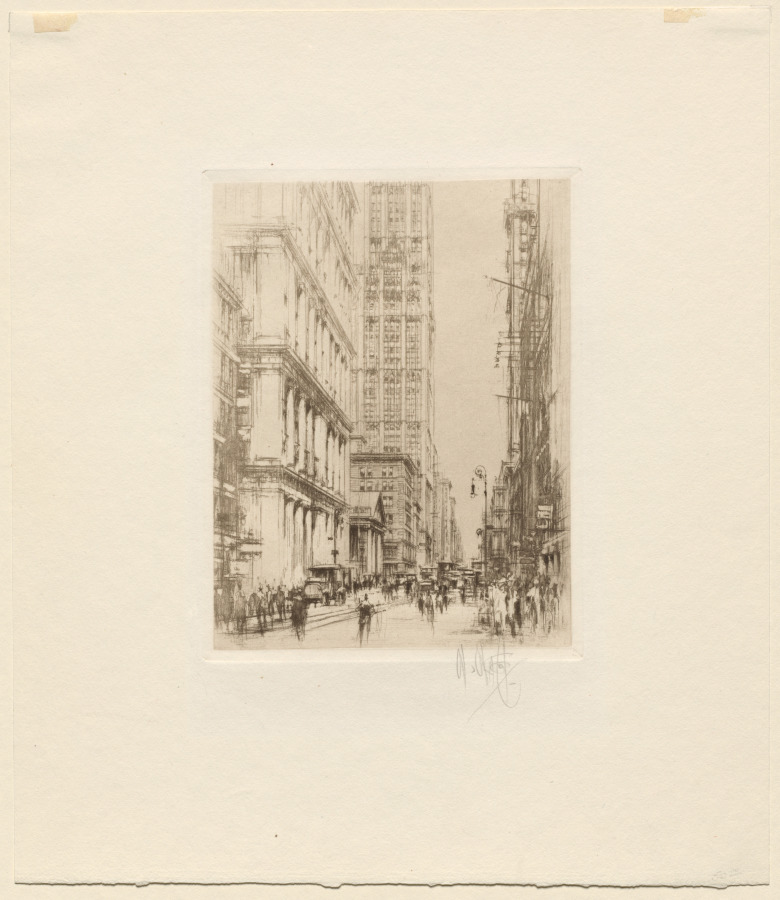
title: Lower Broadway, Down-Town New York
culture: England, 20th century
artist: William Walcot (British, 1874–1943)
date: 1924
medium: etching in brown, plate tone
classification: Print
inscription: signed lower right in pencil: W. Walcot